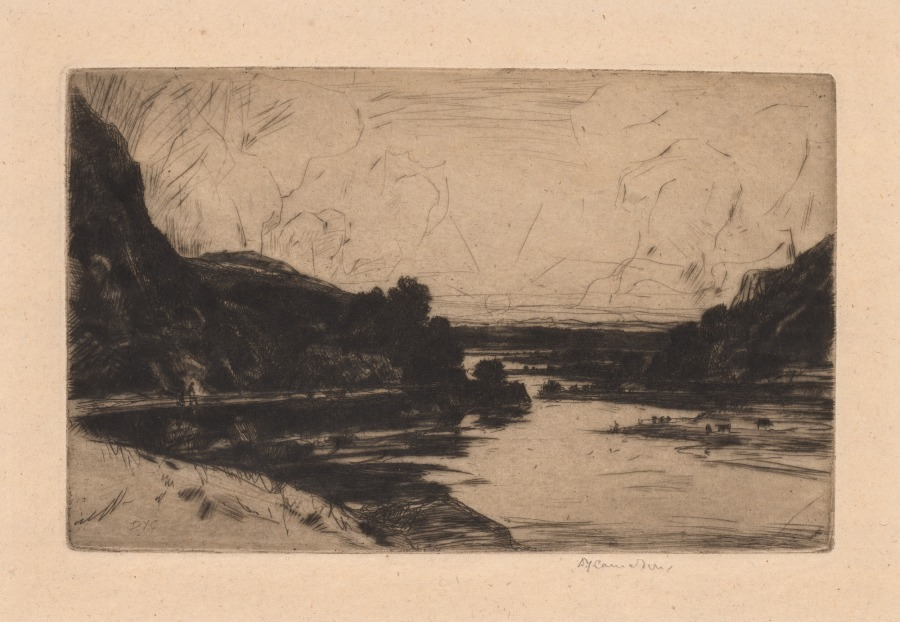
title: On the Ourtha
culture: Britain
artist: David Young Cameron (British, 1865–1945)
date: 1907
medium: Etching and drypoint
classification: Print